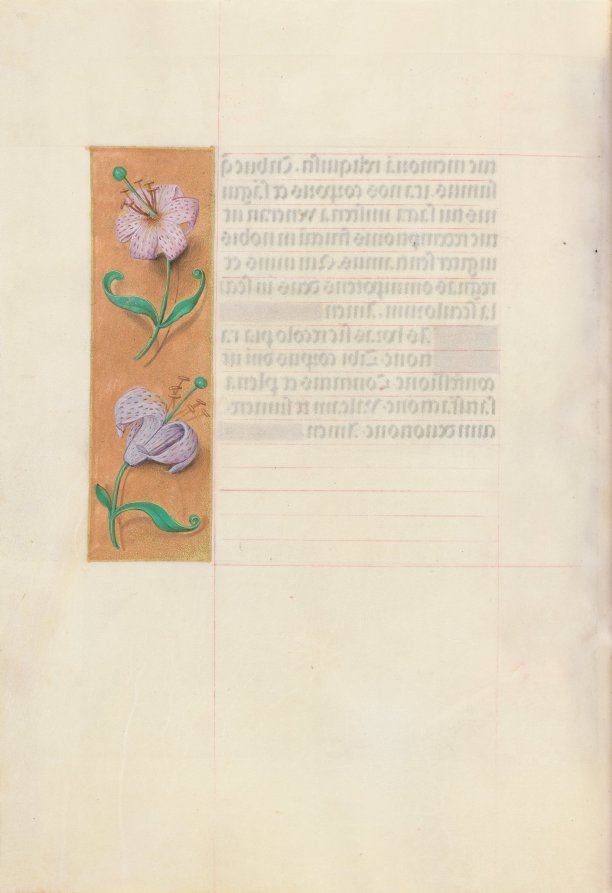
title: Hours of Queen Isabella the Catholic, Queen of Spain: Fol. 49v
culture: Flanders, Ghent and Bruges, late 15th century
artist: Master of the First Prayerbook of Maximillian (Flemish, c. 1444–1519)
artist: and Associates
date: c. 1500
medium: ink, tempera, and gold on vellum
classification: Bound Volume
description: This manuscript was illuminated by a circle of at least five highly organized manuscript painters active in the Flemish cities of Ghent and Bruges. The principal illuminator was Alexander Bening, who painted the majority of the book's miniatures. Manuscripts produced by this circle of artists are renowned for the decoration of their borders, which typically feature a rich variety of realistically-painted flowers, birds, and butterflies. This prayer book, called a book of hours, was intended not for a cleric, but for the private devotions of a lay person-in this case, Isabella the Catholic, Queen of Spain (1451-1504). Isabella's coat of arms embellishes the book's frontispiece. It is unlikely that the book was commissioned by the Queen herself; rather, she probably received it as a diplomatic gift from someone courting her patronage, perhaps Cardinal Francisco Jimenez de Cisneros. A Franciscan friar, Jimenez was dependent upon Isabella for his advancement, first to the post of Queen's confessor in 1492, and then to Archbishop of Toledo in 1495.